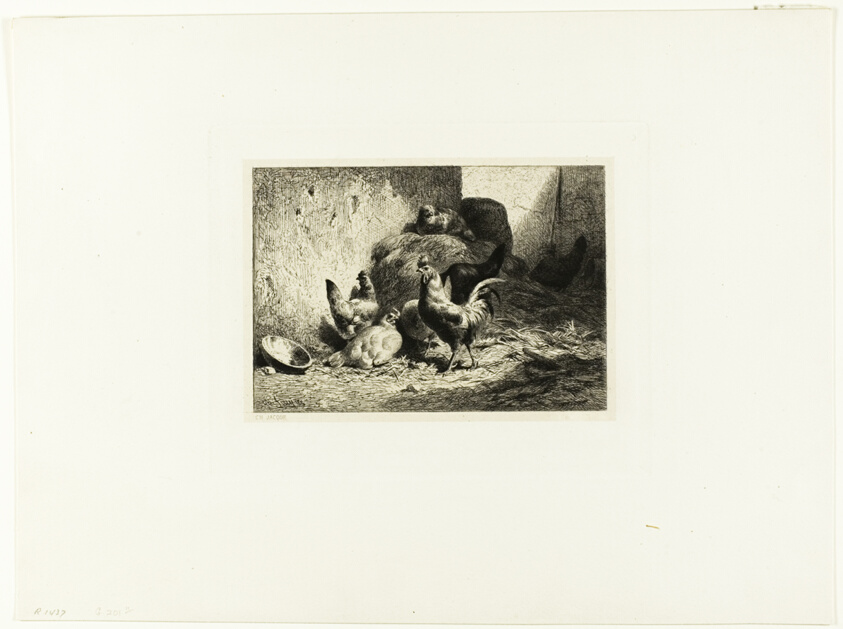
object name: Print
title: Rooster and Hens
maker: Charles Émile Jacque (French, 1813-1894)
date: c. 1864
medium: Etching, drypoint and roulette on cream China paper laid down on ivory wove paper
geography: France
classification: etching; print; prints and drawing